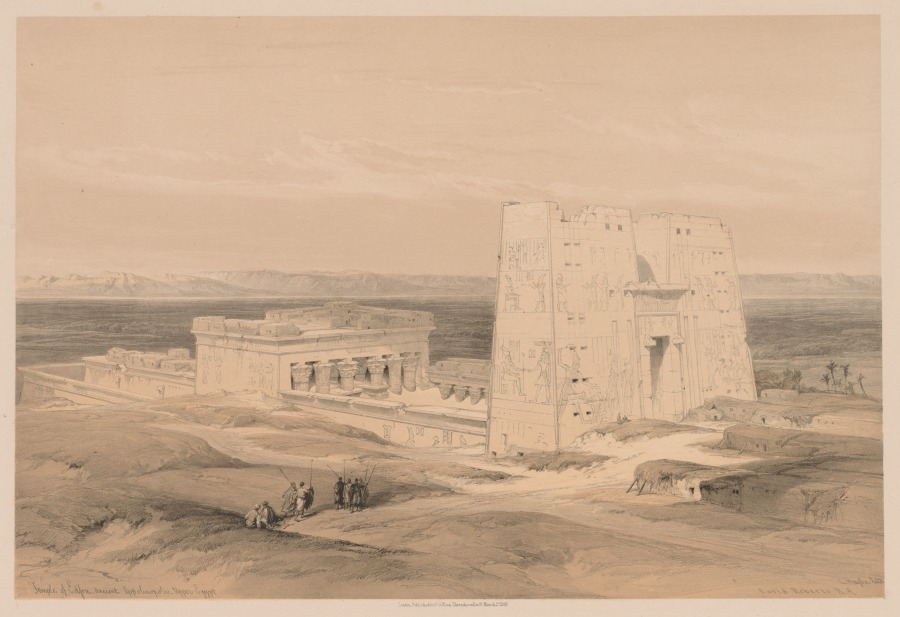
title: Egypt and Nubia: Volume I - No. 34, Temple of Edfou. Ancient Appolinopolis, Upper Egypt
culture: England, 19th century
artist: Louis Haghe (British, 1806–1885)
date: 1838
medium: color lithograph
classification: Print